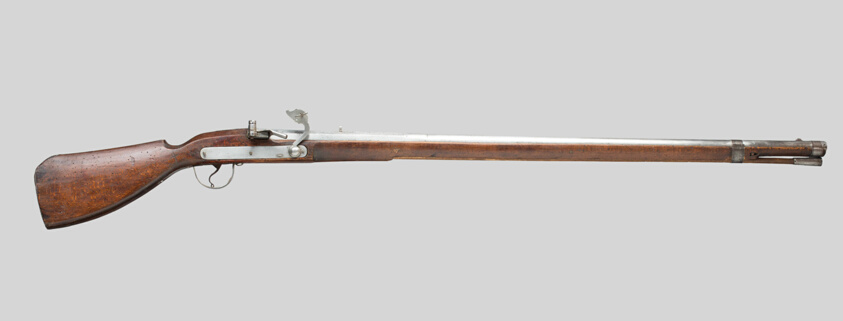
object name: Arms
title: Matchlock Musket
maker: Austrian, Vienna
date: c. 1640/60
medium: Wood, walnut, and steel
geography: Wien state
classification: firearm-long gun; arms; arms and armor